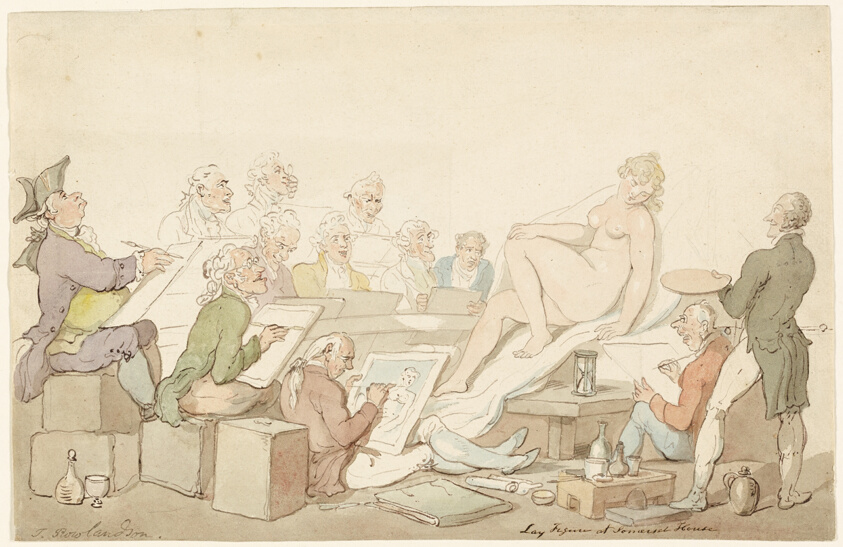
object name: Drawing and Watercolor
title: Lay Figure at Somerset House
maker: Thomas Rowlandson (English, 1756-1827)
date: 1822/27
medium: Pen and brown ink with brush and watercolor over graphite, on ivory wove paper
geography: England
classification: watercolor; drawings (visual works); prints and drawing